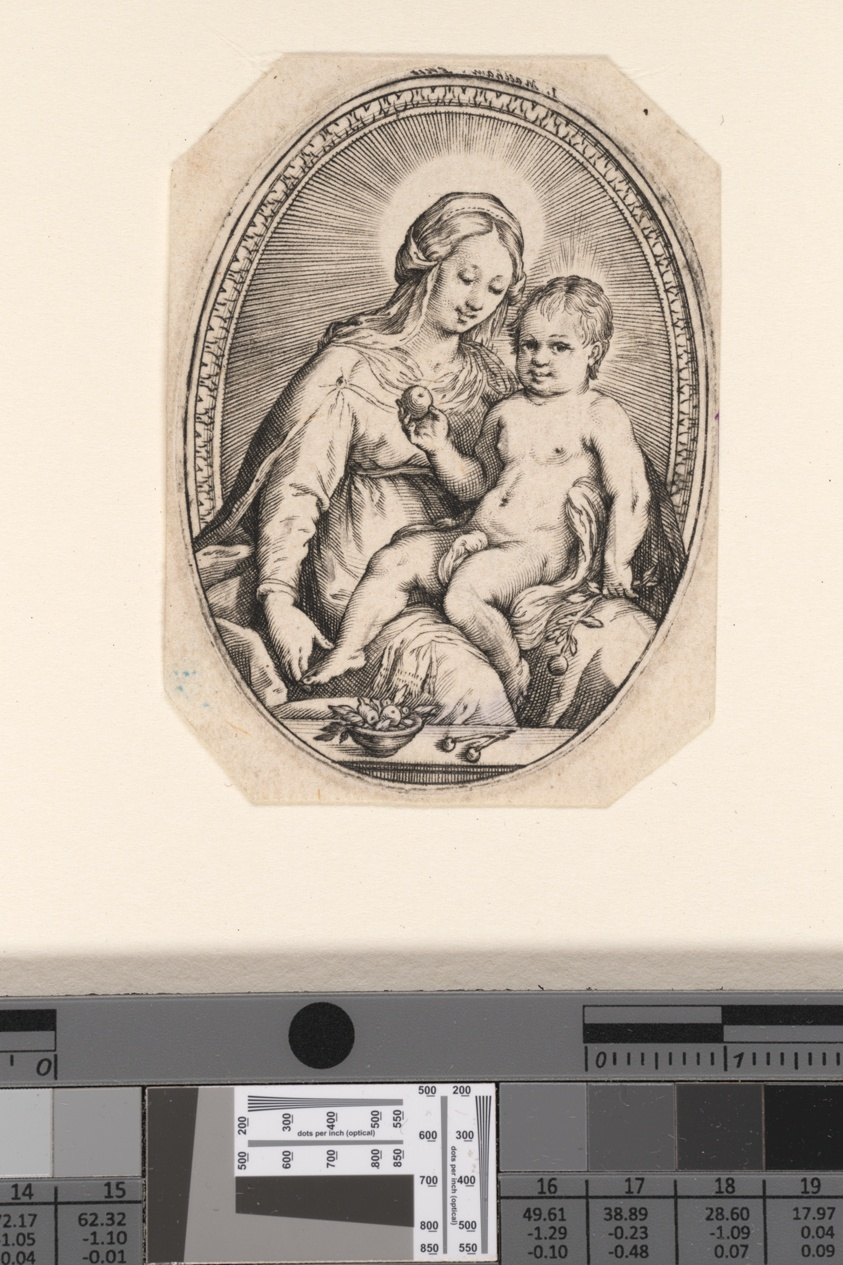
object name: Print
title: The Virgin and Child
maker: Jacob Matham (Dutch, 1571–1631); after Hendrick Goltzius (Dutch, 1558–1617)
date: c. 1600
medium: Engraving on paper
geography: Netherlands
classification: engraving; paper; print; prints and drawing